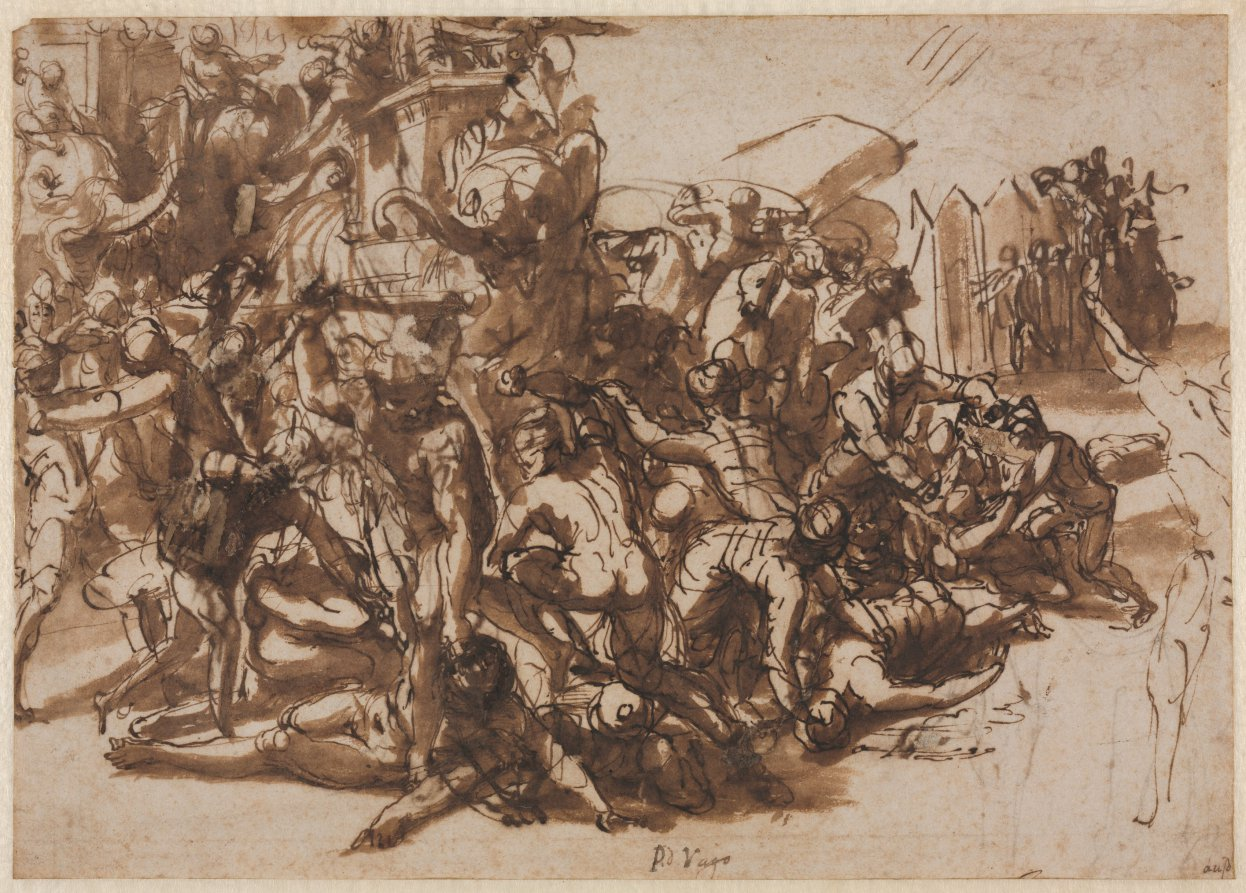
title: Poros Assailed by the Macedonian Army (recto)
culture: Italy, 16th century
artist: Perino del Vaga (Italian, 1501–1547)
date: c. 1545/47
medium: pen and brown ink (iron gall) and brush and brown wash; framing lines in gold paint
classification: Drawing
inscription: lower center, in brown ink: P.d Vago ; lower right, in brown ink: aud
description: Perino del Vaga made this spirited pen and ink and wash drawing as a preliminary sketch for a fresco cycle depicting the military campaigns of Alexander the Great, intended for the apartments of Pope Paul III in the Castel Sant’Angelo in Rome. At the time, he was also working on commissions at the Vatican Palace where he studied and drew from the frescoes of Michelangelo in the Sistine Chapel. One pose in the drawing, that of the man in front who, sword poised over his head, prepares to strike a man below, was probably inspired by Michelangelo’s rendering of David and Goliath on the ceiling. Perino adapted the violent pose for a military rather than biblical subject, filling out the scene with trumpeting elephants and a pile of soldiers in combat. On the verso of the sheet, Perino drew a quick sketch of a standing camel and another, closer view of the animal's head and legs.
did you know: This artist was in Rome in 1527 when the troops of Charles V sacked the city, and was imprisoned and forced to pay a heavy ransom for his, his wife's, and his daughter's safe release.